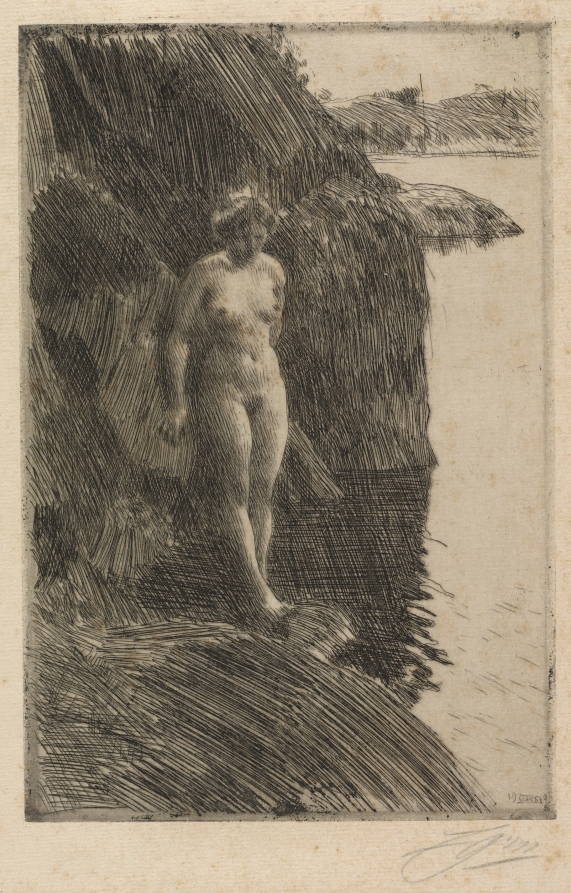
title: Precipice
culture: Sweden, early 20th Century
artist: Anders Zorn (Swedish, 1860–1920)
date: 1909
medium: etching and drypoint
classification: Print